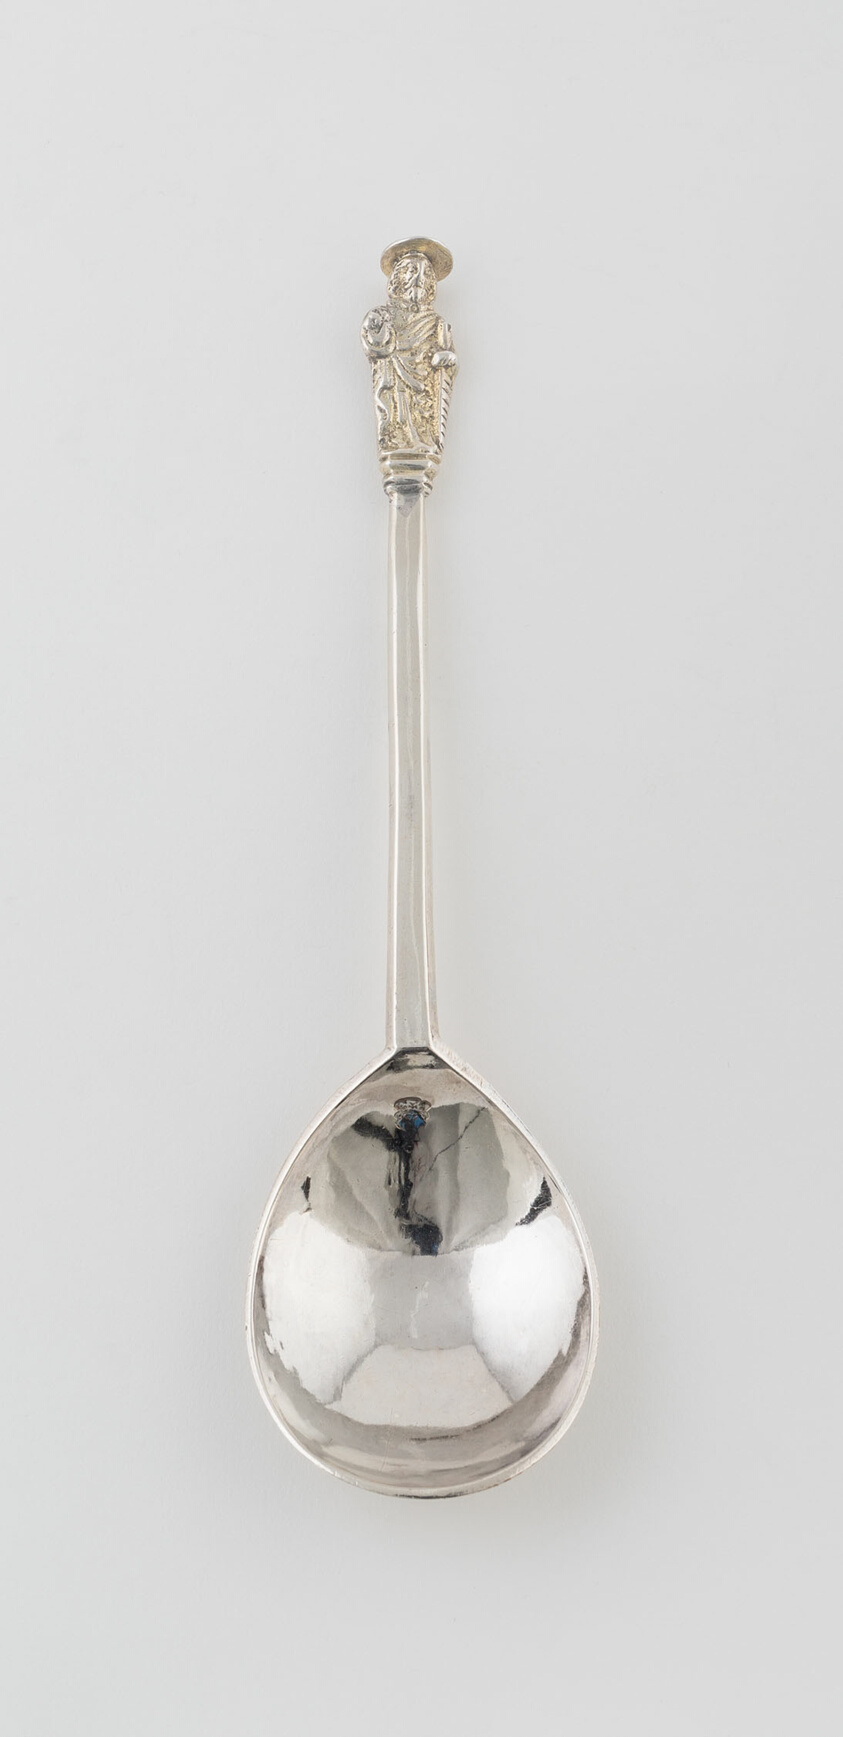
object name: Metalwork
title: Apostle Spoon: St. Simon Zelotes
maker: London, England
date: 1637/38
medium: Silver; figure gilded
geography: London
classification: silver; metalwork; european decorative arts